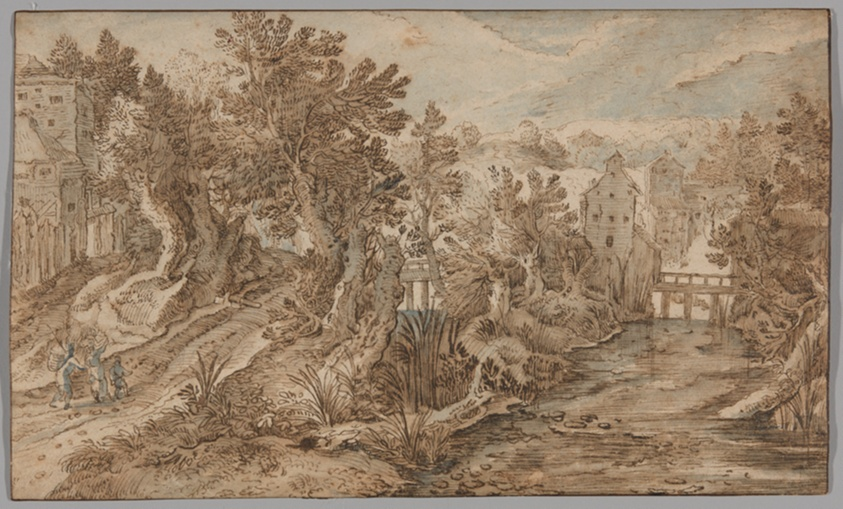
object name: Drawing and Watercolor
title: Village Scene with a River and Wooden Bridge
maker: Peeter Stevens, II (Flemish, 1567-after 1624)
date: 1595/1600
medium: Pen and brown ink and brush and brown and blue washes on cream laid paper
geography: Flanders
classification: pen and ink drawings; drawings (visual works); prints and drawing